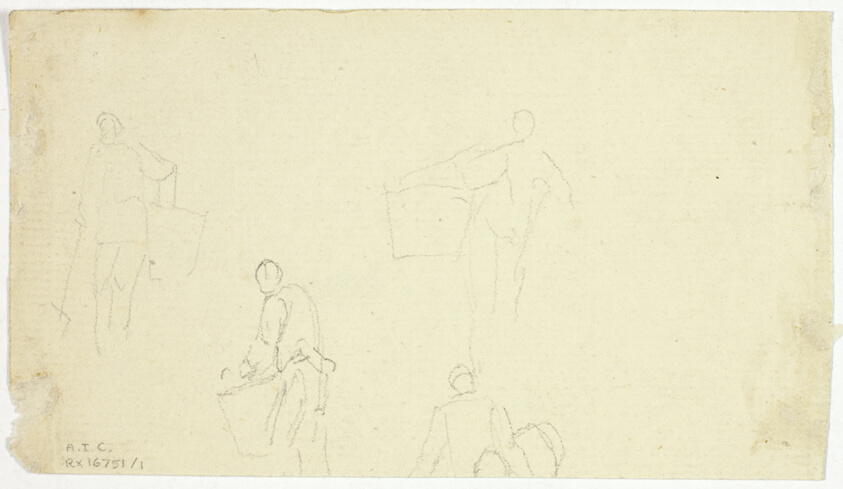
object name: Drawing and Watercolor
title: Horses with Groom (recto); Sketches of Peasant with Basket (verso)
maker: William Henry Pyne (English, 1769-1843)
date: n.d. (recto); 1789/1843 (verso)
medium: Graphite (recto and verso) on ivory laid paper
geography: England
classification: graphite; drawings (visual works); prints and drawing